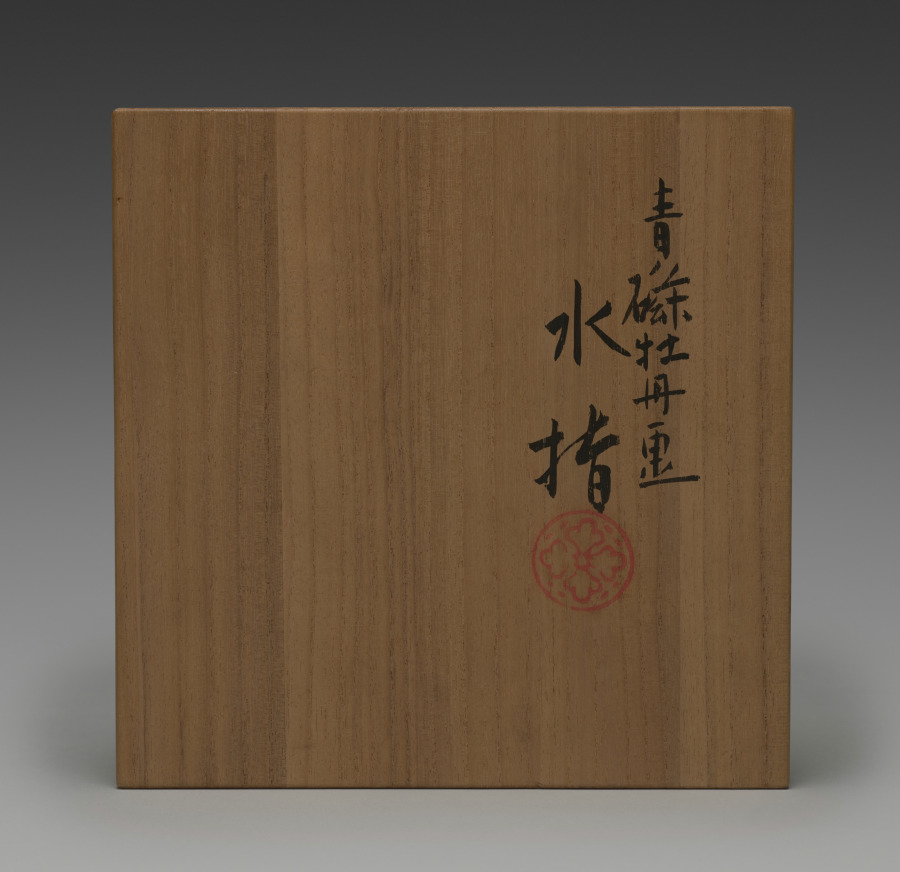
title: Water Container with Peonies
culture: Japan, Meiji period (1868–1912)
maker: Seifū Yohei III (Japanese, 1851–1914)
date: 1900–1914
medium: Porcelain with molded and carved design, green glaze, and black lacquered lid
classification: Ceramic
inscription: 清風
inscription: 帝室技芸員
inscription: 清風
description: This ceramic is an especially accomplished example of Yohei III’s combination of an allover translucent colored glaze with molded and carved designs. It features the peony as its primary motif. The water container, or mizusashi, has a green glaze, and its design takes into consideration the rounded shape and the seated position of the host and guests. It begins low on the body with a flower just beginning to open and continues with another flower a bit higher up, with its petals fully extended and beginning to open outward. It finishes with a flower in full bloom, petals and leaves unfurled and spread outward from the center, now occupying almost the entire surface. The water container once belonged to the Hosokawa family, whose go-between corresponded with Yohei IV about the piece. Yohei IV thanked them for their payment and requested that despite his father’s death in the previous year, they continue to favor the studio with their orders. The letter and its envelope, as well as an auction tag, remain with the object.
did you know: This water container may also serve as a site for cultural reckoning, as when the life cycle of a flower prized in East Asia as a symbol of wealth is displayed across a Japanese chanoyu vessel whose glaze is associated with the seats of power in China and Korea.